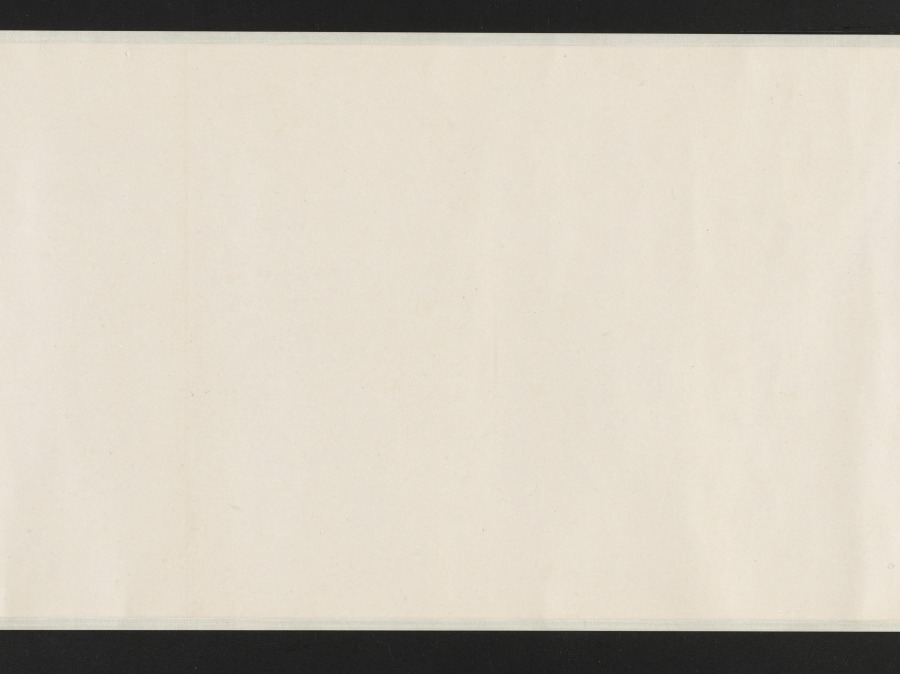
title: Nine Songs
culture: China, Yuan dynasty (1271-1368)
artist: Zhang Wo (Chinese, active c.1336–after 1364)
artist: Chu Huan (Chinese, active 1361)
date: 1361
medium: handscroll; ink on paper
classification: Painting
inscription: 7 colophons and 47 seals: 1 colophon, dated 1361, and 28 seals of Chu Huan 褚奐 (active c. 1361); 1 colophon, dated 1785, and 1 seal of Lu Shihua 陸時化 (1714-1779); 2 seals of Lu Yü-ch'ing (18th c.); 1 colophon, dated 1935, of Ye Gongchuo 葉恭綽 (1881-1968); 1 colophon, dated 1935, of Wu Hufan 吳湖帆(1894–1968); 1 colophon, dated 1938, and 1 seal of Wang Tongyu 王同愈 (1856-1941); 1 colophon, dated 1941, of Wu Huayuan 吳華源 (1893-1972); 1 colophon, dated 1942, and 9 seals of Xu Bangda 徐邦達 (1911–2012); 1 colophon, dated 1942, of Lang Jingshan 郎靜山 (1892-1995); 1 colophon, dated 1944, of Tang Yun 唐雲 (1910-1993); 6 seals of Wang Jiqian [C.C. Wang] 王季遷 (1907–2003).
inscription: Text of The Nine Songs written by Chu Huan at the end of each section.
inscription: 右離騷九歌圖，宋龍溟居士李公本，淮南張渥叔厚所畫妙絕當世。家藏請予書其辭目識于左。至正二十一年辛醜三月旦河南褚奐記。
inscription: Colophon by Lu Shihua 陸時化 (1714–1789): This scroll is fortunate to have been handed down from collections of the right people. Now, after 500 years, its condition is as good as when it was painted. I acquired this from Mr. Shen Guiyu [1673-1769], the President of the Board of Rites. The label is in his handwriting when he was 95 years old. I submit that Chu Huan (t. Shiwen) of the Yuan Dynasty was a native of Qiantang. His "seal" and li writings are in the style of Wu Rui. For example, in [Chu Kuei's] Ming ji lu [A list of masterpieces] is recorded the stele commemorating the restoration of the prefectural school of Kun-shan, the text of which was composed by Yang Weizhen in the twenty-first year of Zhizheng [1361]; and the calligraphy as well as the title in li style was by Chu Huan, who was at that time an assistant judge of the prefecture of Haining in the circuit of Hangzhou. Zhang Wo's zi is Shuhou (叔厚). His literary name is Zhen Qisheng (贞期生). According to [Gu Ying's] Yu shan cao tang ya jii, he liked to paint in the bai-miao or the "pure delineation" style after the method of Li Longmian [Li Gonglin 李公麟], which finds no peer among the ancient masters. This is agreed upon [by Pei Ch'iung] in his Qing jiang zhi who praised [Zhang Wo] as being quite learned and well-versed in many branches of the arts, especially figure painting. Recorded by Lu Shihua [The mountain dweller], listening to the pine, in the twelfth month of the yisi year [1785].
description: Painted in the baimiao, or fine-line drawing style, this ancient work demonstrates the literati’s use of abstract calligraphic brushwork for self-expression. The subject of the “Nine Songs”—songs associated with shamanistic rituals in the ancient Chu kingdom—had traditionally provided artists with myths and legends that they could explore and reinterpret in their own works.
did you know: Divided into eleven sections, the scroll contains illustrations by painter Zhang Wu followed by a transcription of the relevant verse by calligrapher Chu Huan.